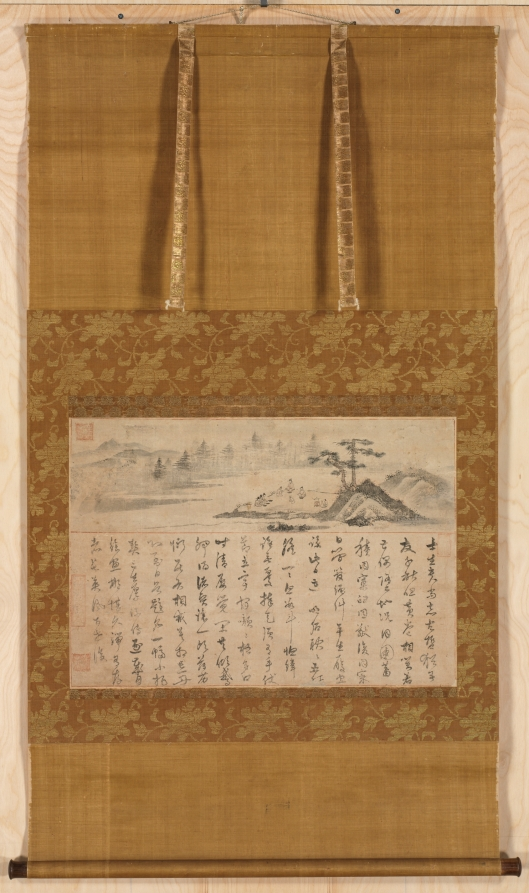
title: Gathering among the Members of Office Censor-General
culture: Korea, Joseon dynasty (1392–1910)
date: 1700s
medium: hanging scroll with calligraphy, ink and light colors on paper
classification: Painting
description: In the early Joseon period, paintings of scholar-officials’ gatherings (gyehoedo) gained popularity among the Korean elite. This painting was commissioned by Sim Eongwang, an official of the Joseon court, to depict a miwon gyehoedo, a gathering of cabinet members (saganwon). This meeting is assumed to have been ordered around the time when Sim was the head of the saganwon in 1530. At the bottom of the painting, he added his poem to express a "literati respect for high spirituality," as stated in the first line. The poem was later recorded in his anthology titled Eochonjip (Book of Fisher Village). This painting itself, however, is an 18th-century copy of the original 16th-century painting.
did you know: The gathering portrayed in this painting took place in the 16th century, but the painting itself is a later copy, possibly of the 18th century.